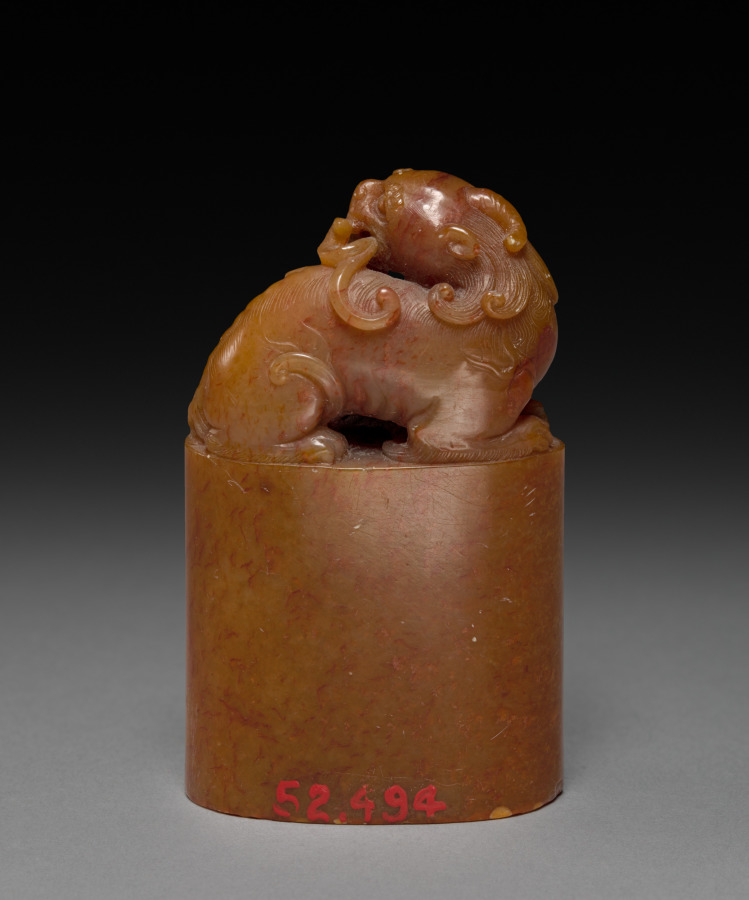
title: Seal with Reclining Qilin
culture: China, Qing dynasty (1644–1911), Qianlong reign (1736–95)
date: 1736–95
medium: tianhuang stone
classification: Stone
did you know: The elliptical seal has three characters in archaic script enclosed by two dragons.